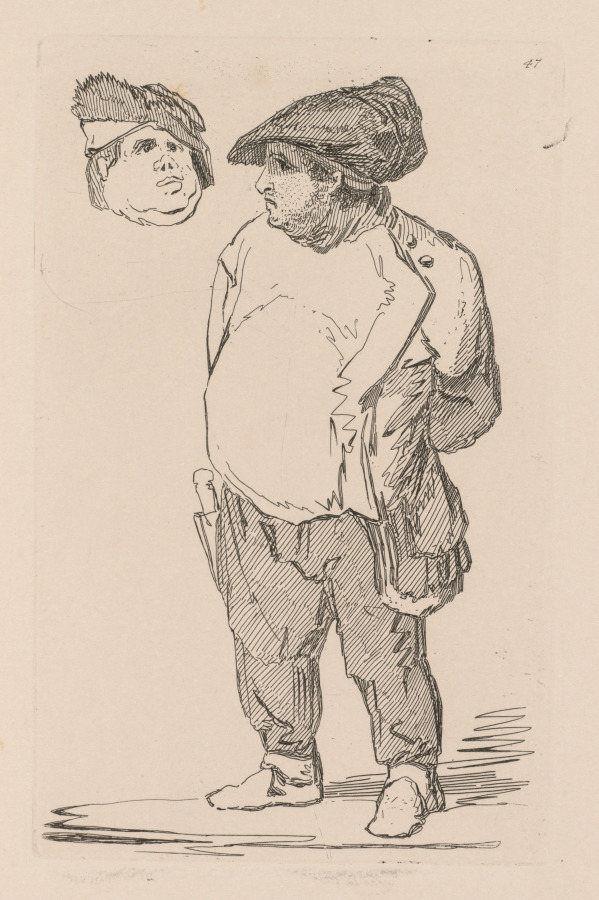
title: Liber Studiorum: Plate 47, A Study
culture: England, 19th century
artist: John Sell Cotman (British, 1782–1842)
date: 1838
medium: softground etching, from a bound volume containing 48 plates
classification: Bound Volume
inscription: In plate, within image, upper right: 47